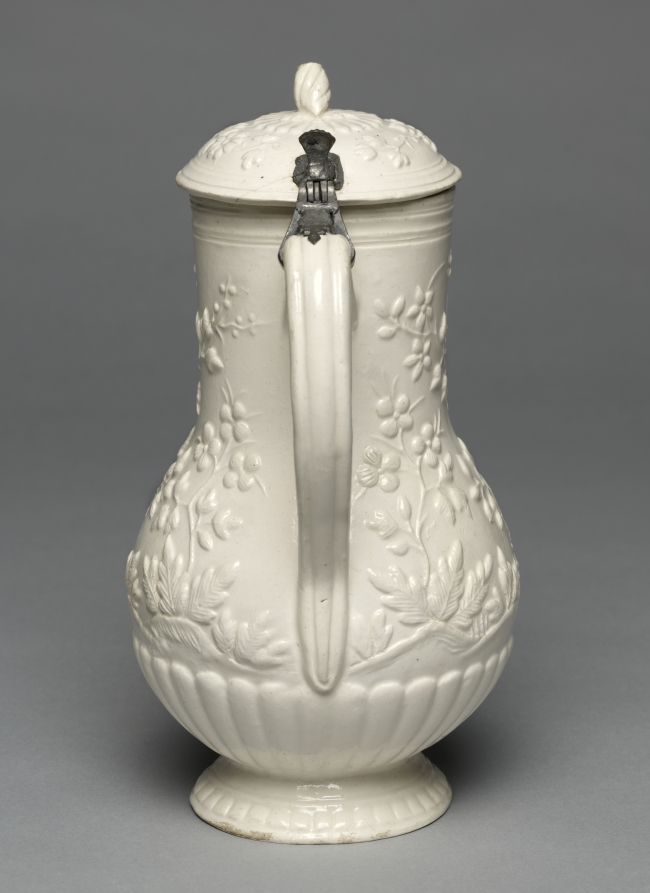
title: Covered Milk Jug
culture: France, Paris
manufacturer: Pont-aux-Choux Factory (French)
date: c. 1770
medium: Lead- glazed earthenware (faience fine); pewter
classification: Ceramic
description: Cream-colored earthenware was introduced by Wedgwood in the 1760s. He exported it to the continent, where it was quickly imitated. In France the ware was known as faience fine and the Pont-aux-Choux factory in Paris was the most famous manufacturer of such wares. Cream ware was harder and thus more durable than traditional faience.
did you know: Milk jugs with lids or covers usually held warm milk for coffee or tea.